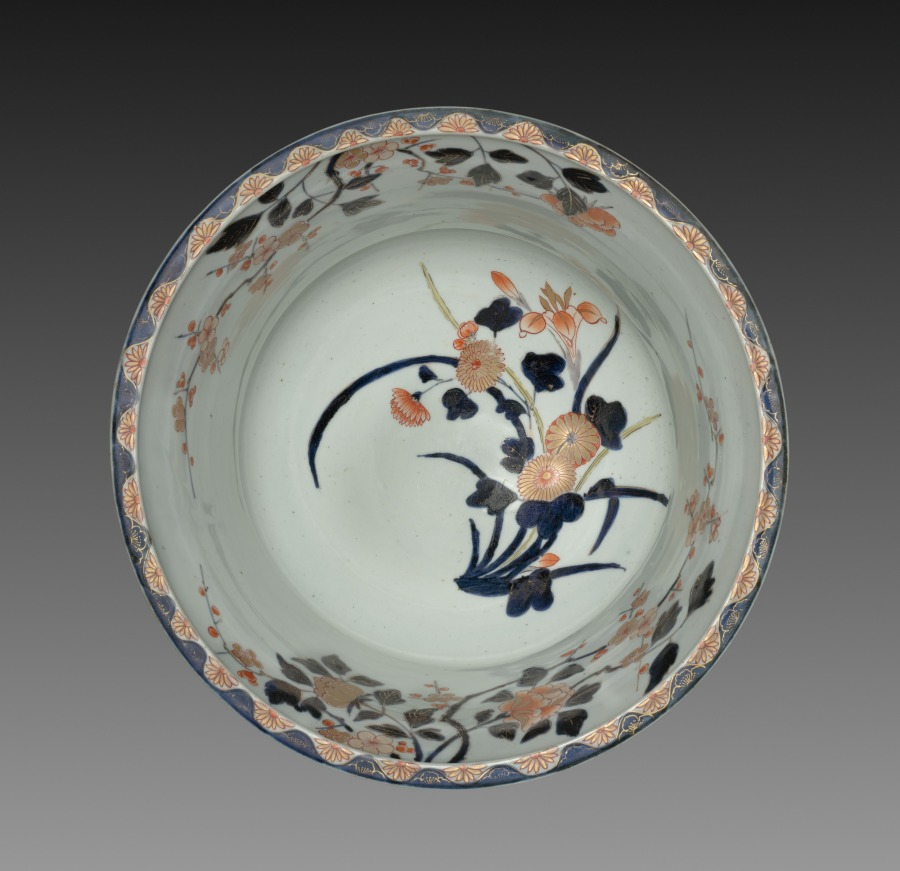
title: Vase (Imari ware)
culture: Japan, Edo period (1615–1868)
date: c. 1700s–1800s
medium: underglaze blue with overglaze red porcelain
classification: Ceramic